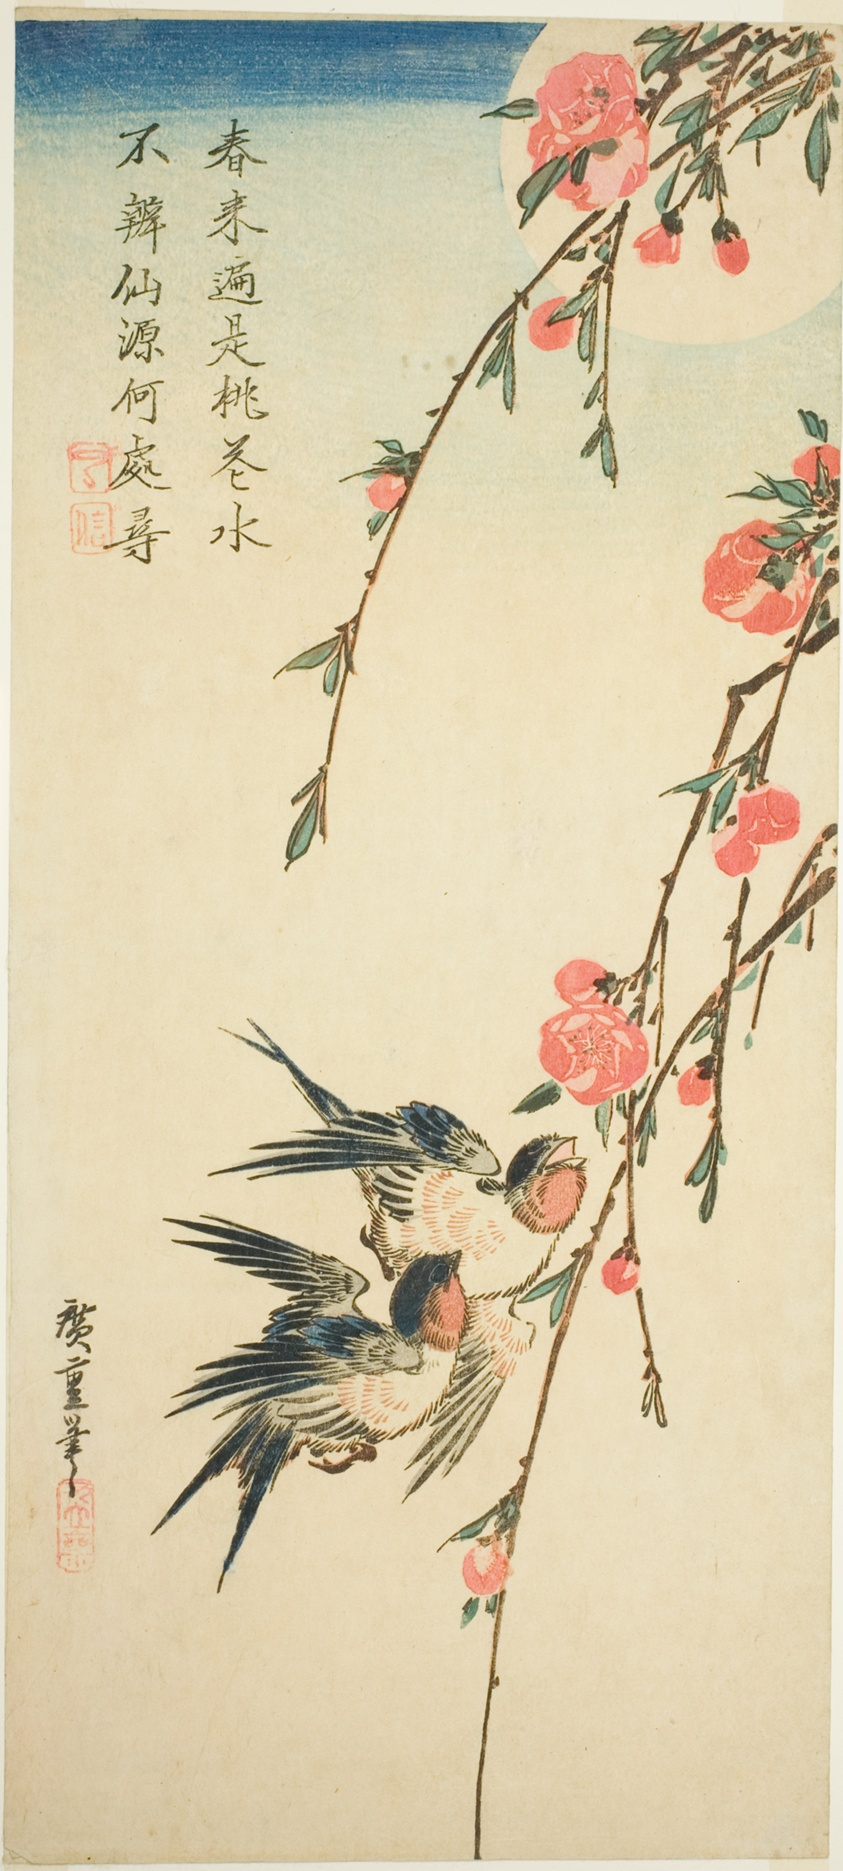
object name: Print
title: Swallows, pleach blossoms, and full moon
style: Japanese (culture or style)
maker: Utagawa Hiroshige 歌川 広重; Japanese, 1797-1858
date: 1830s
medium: Color woodblock print; otanzaku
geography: Japan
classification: woodblock print; print; asian art